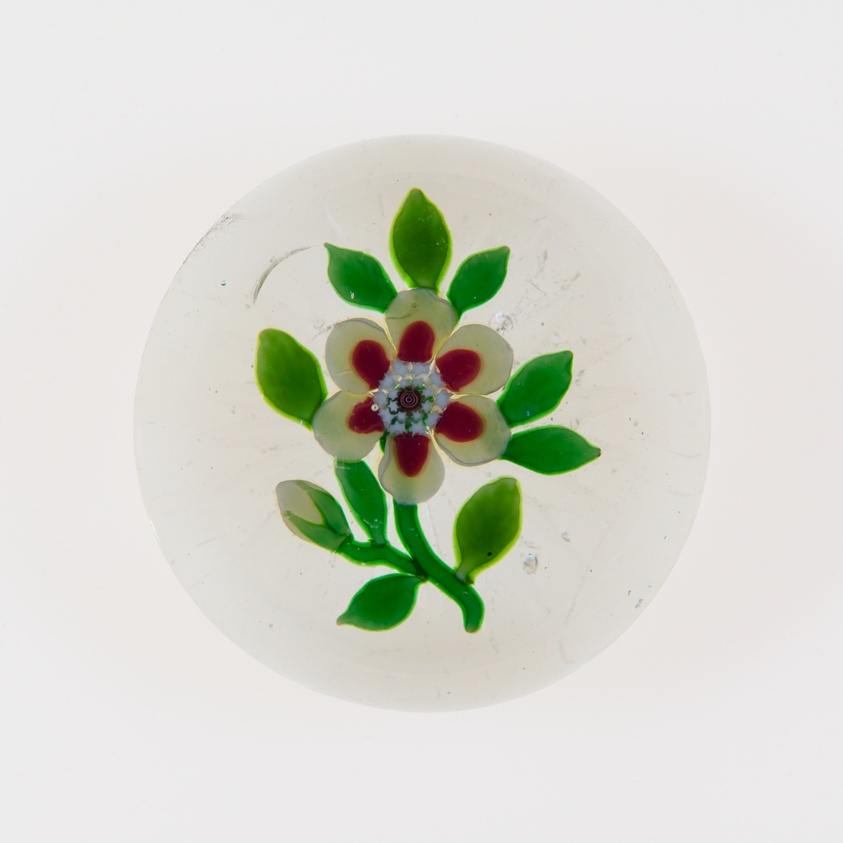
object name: Glass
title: Paperweight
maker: Baccarat Glassworks (Cristalleries de Baccarat); Lorraine, France, founded 1764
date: c. 1848–55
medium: Glass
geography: Baccarat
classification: paperweight; glass